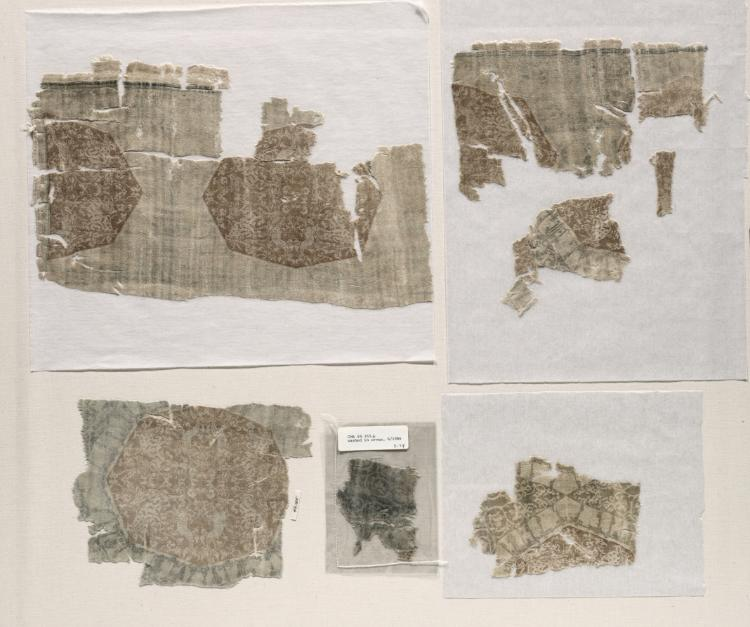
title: Fragment with Octagons and Four-Pointed Stars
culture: Iran ?, in the style of the Buyid period (945–1055)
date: 1521–1955 (radiocarbon date, 95% probability)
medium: Silk: lampas weave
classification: Textile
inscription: "inni la-'a'lamu wal-layl janan anna al-jannah fi arja' difafihi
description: The design consists of aligned large-scale octagons and four-pointed star-shaped interspaces filled with leafy scrolls. Each octagon encloses pairs of regardant gazelles and nonregardant rabbits in mirror image against a foliate background, patterned in white on a light pinkish-tan ground.